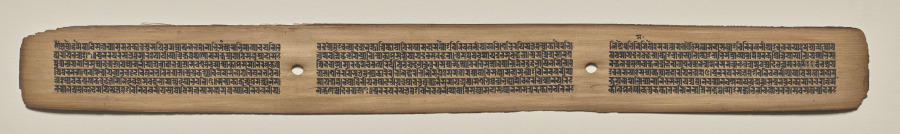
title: Text, Folio 117 (recto), from a Manuscript of the Perfection of Wisdom in Eight Thousand Lines (Ashtasahasrika Prajnaparamita-sutra)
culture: Eastern India, Bihar, Vikramashila Monastery. Painting: Nepal, Kathmandu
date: Sunday, September 14, 1119 (year 239 of the Newar Samvat in the month of Ashvina)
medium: gum tempera and ink on palm leaves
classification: Painting